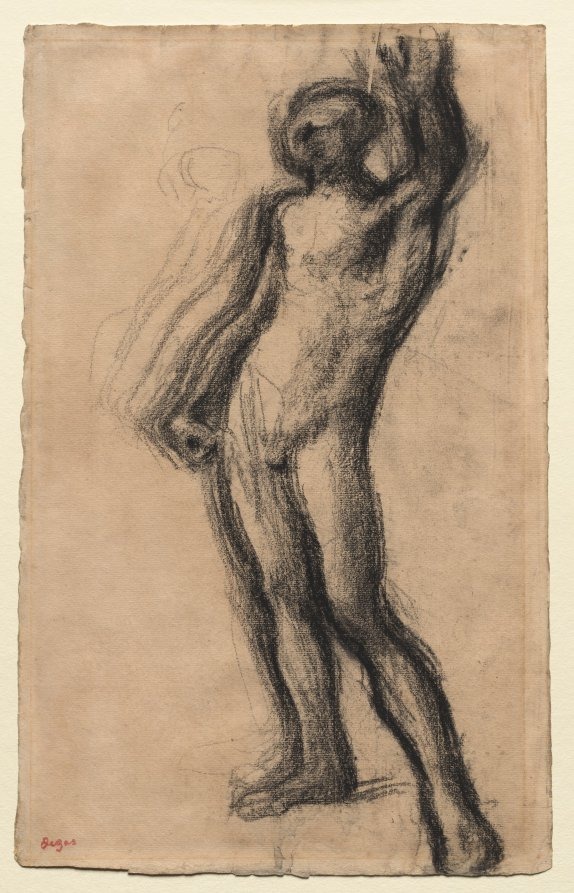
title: Nude Man Standing, with Left Hand Raised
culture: France, late 19th-early 20th Century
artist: Edgar Degas (French, 1834–1917)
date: c. 1900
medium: charcoal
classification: Drawing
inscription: VERSO, upper right, in blue crayon: 1858 [underlined] / Ph 1863 [underlined twice]